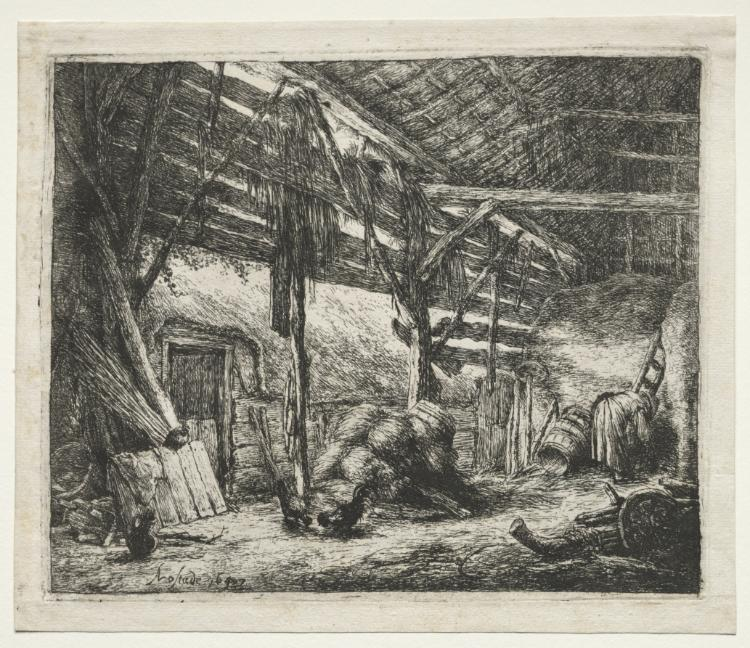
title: The Barn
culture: Netherlands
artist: Adriaen van Ostade (Dutch, 1610–1684)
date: 1647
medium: etching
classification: Print